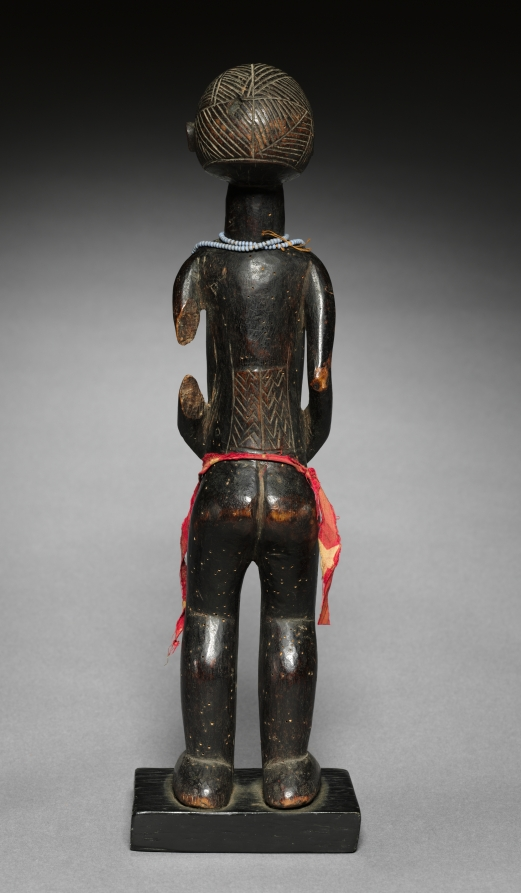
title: Female Figure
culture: Democratic Republic of the Congo, Tabwa, late 19th or early 20th century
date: 1900s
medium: Wood, cloth, glass beads, and natural fiber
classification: Sculpture